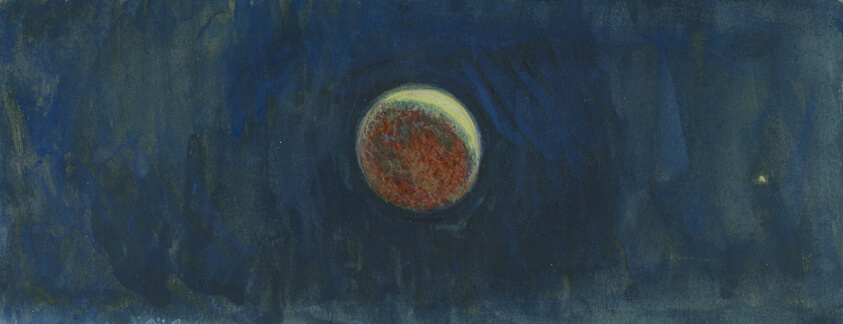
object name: Drawing and Watercolor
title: Study of the Crescent Moon in "The Ship"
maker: William Holman Hunt (English, 1827-1910)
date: c. 1875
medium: Opaque watercolor on cream wove paper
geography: England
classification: prints and drawing; drawing; gouache; paper